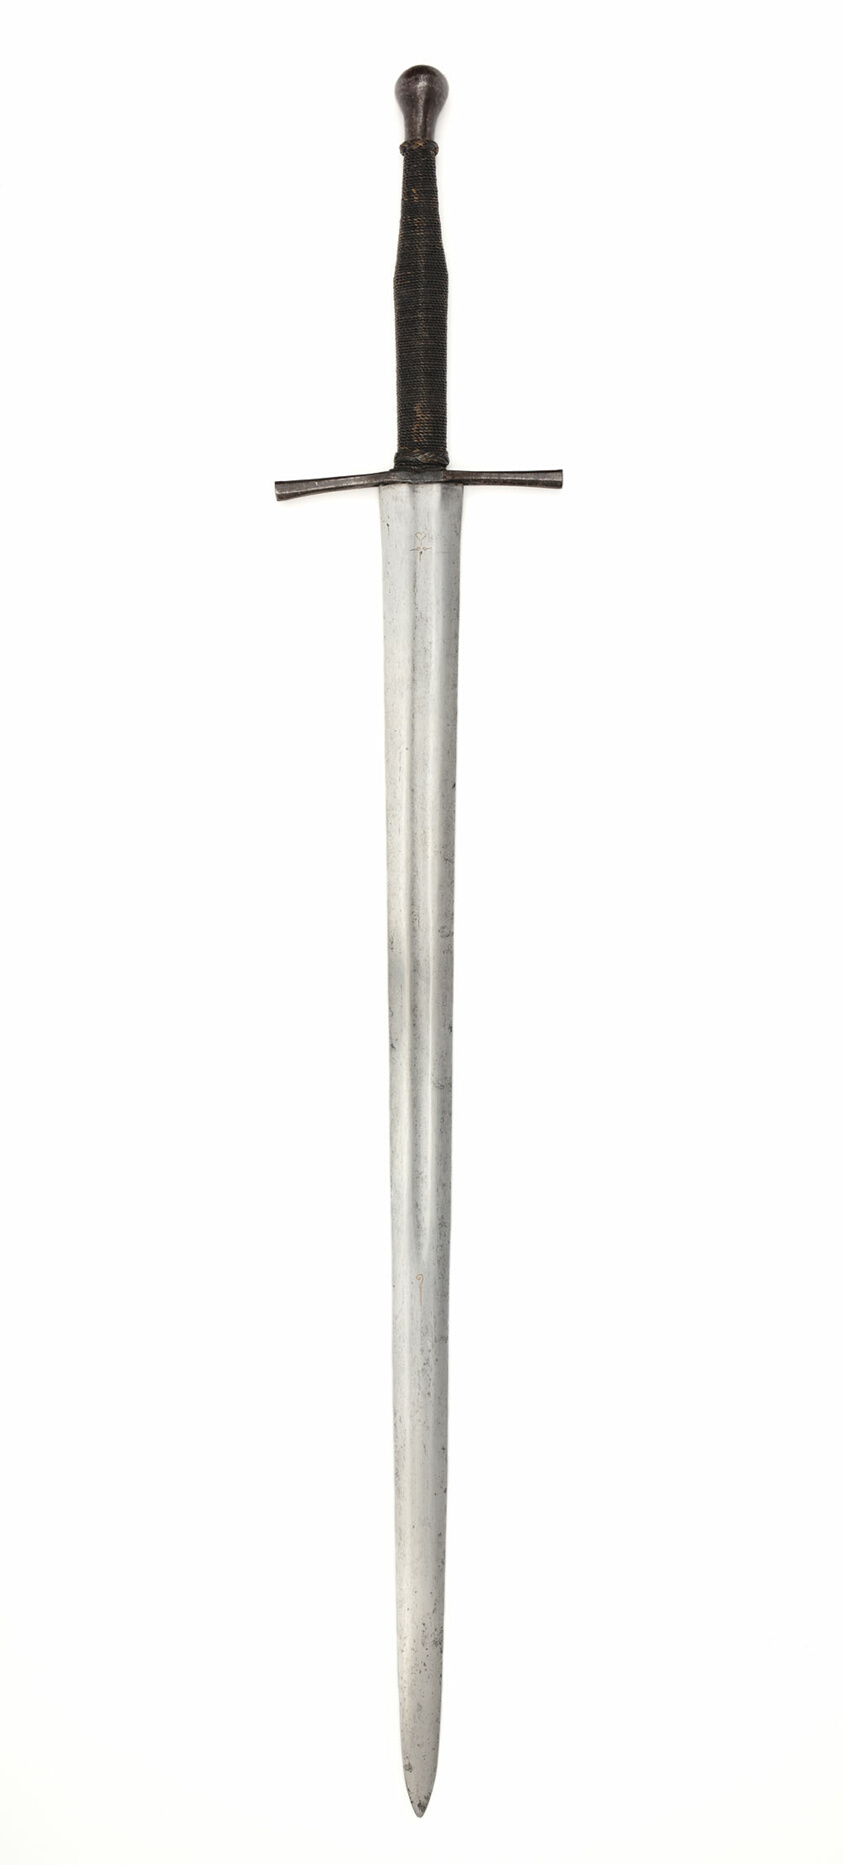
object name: Arms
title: Hand-and-a-Half Sword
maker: German, Passau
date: c. 1520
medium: Steel, iron, cord, and wood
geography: Germany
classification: edged weapon-sword; arms; arms and armor